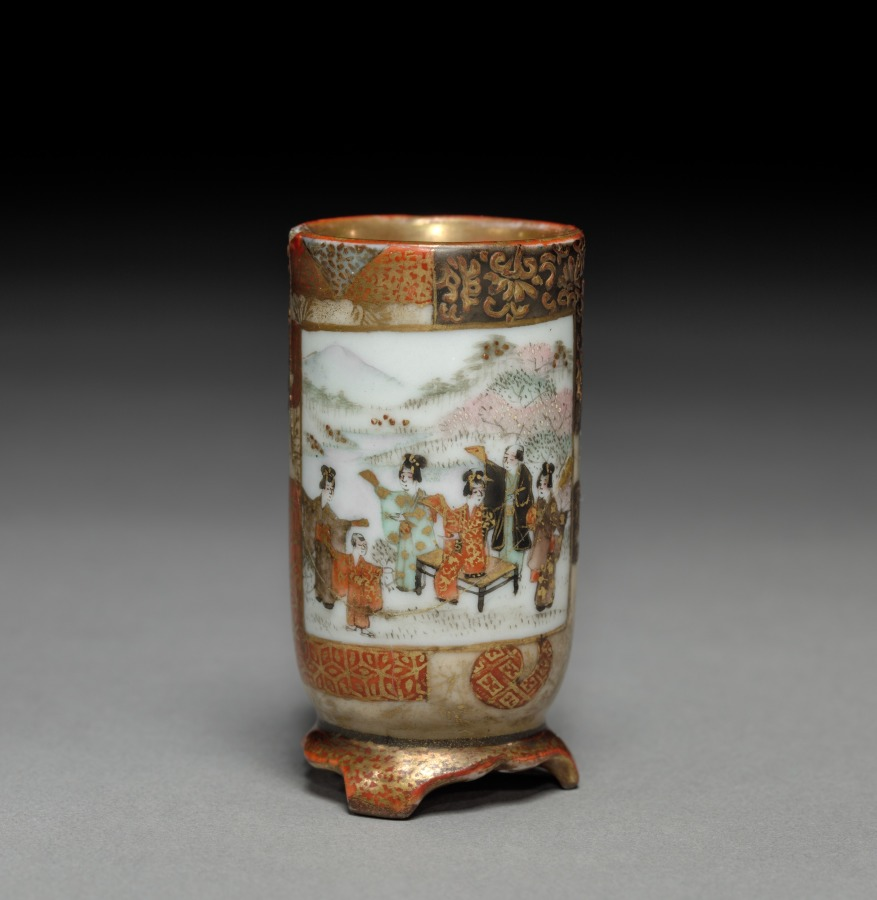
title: Miniature Vase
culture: Japan, Edo period (1615–1868) to Meiji period (1868–1912)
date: 1800s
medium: overglaze porcelain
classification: Ceramic